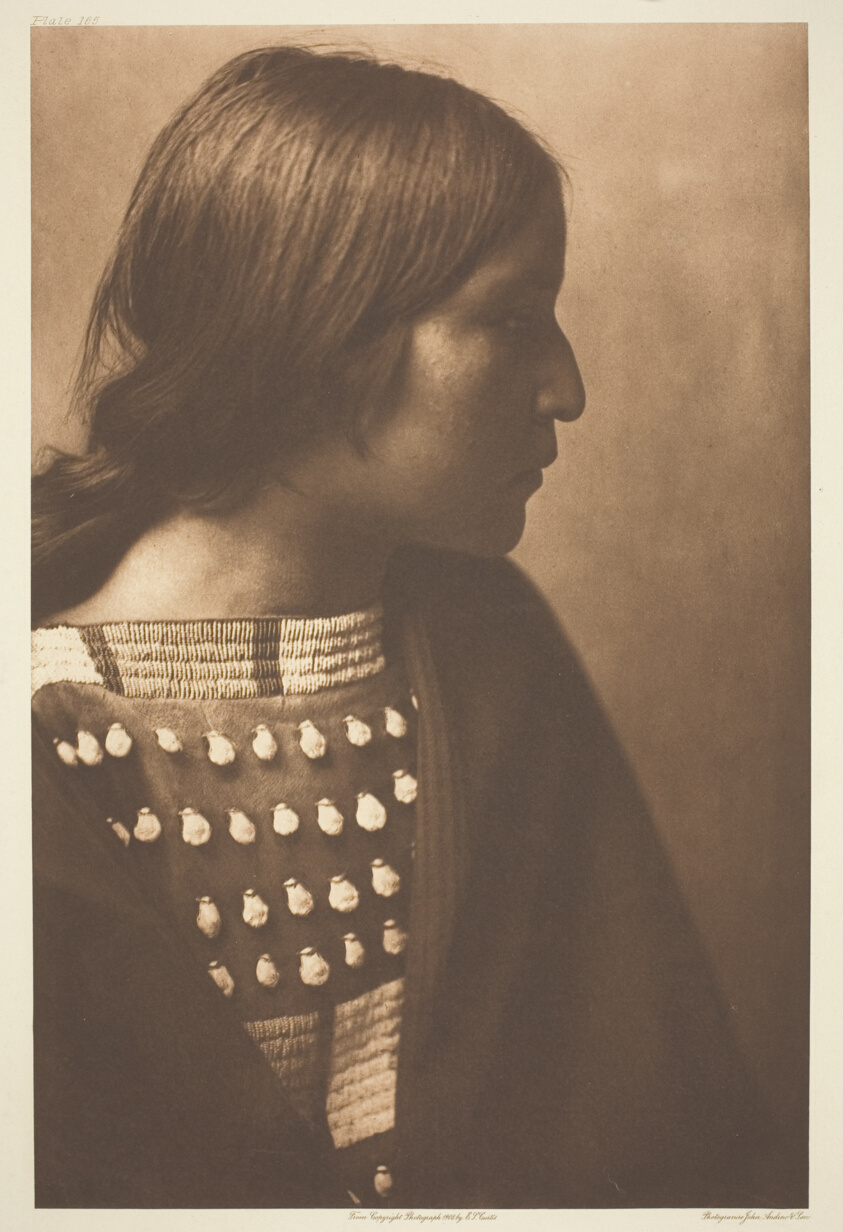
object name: Photograph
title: Arikara Girl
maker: Edward S. Curtis (American, 1868–1952)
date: 1908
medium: Photogravure, plate 165 from "The North American Indian, Volume 5" (1909)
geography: United States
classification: photogravure; photomechanical process; photography; photograph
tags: portraits, portraits: female subject, photography, portraits: Native American subject